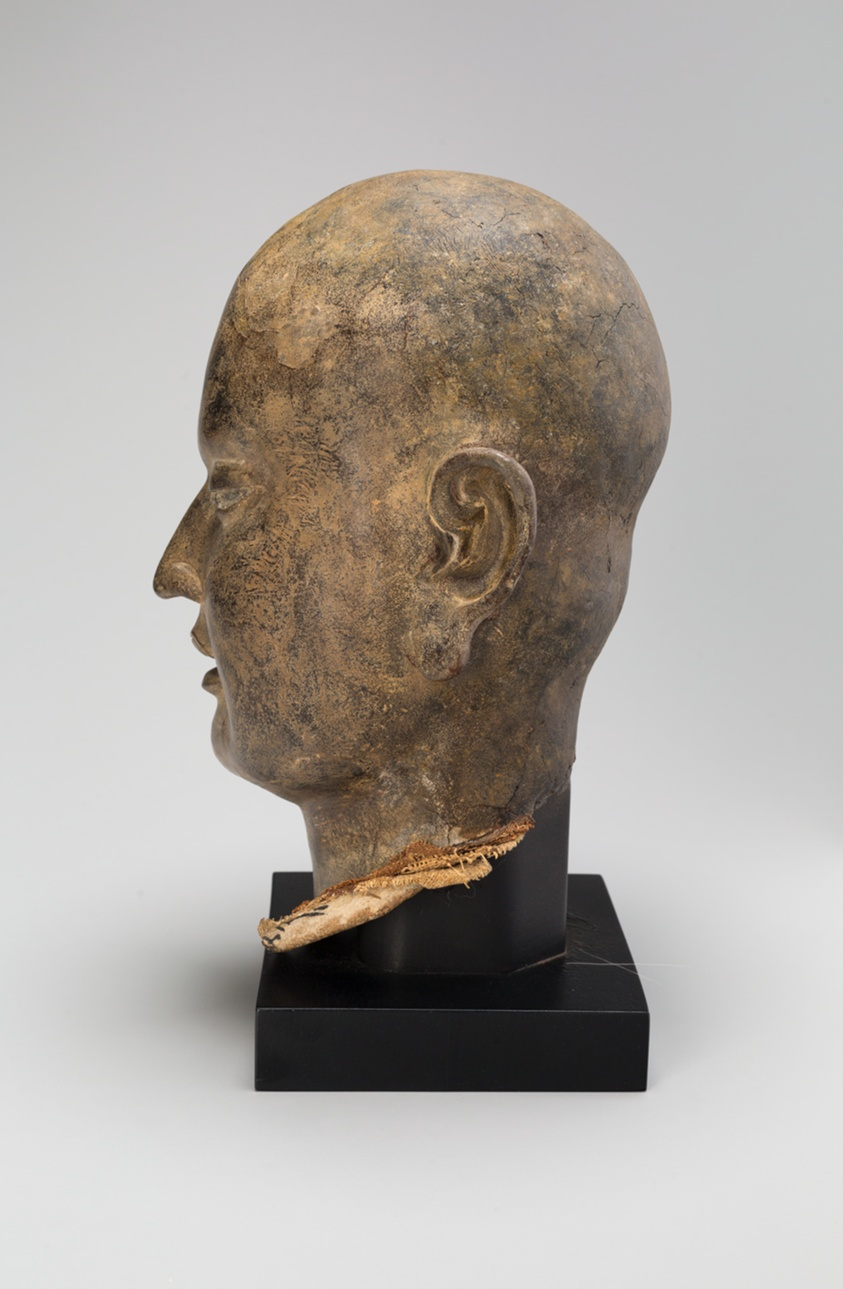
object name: Sculpture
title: Head of a Luohan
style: Chinese (culture or style), northern song, liao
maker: China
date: Northern Song, Liao, or Jin dynasty, c. 11th century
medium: Hollow dry lacquer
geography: China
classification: lacquer; sculpture; asian art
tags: heads, religion, religious figures, Buddhism, Chinese, portraits